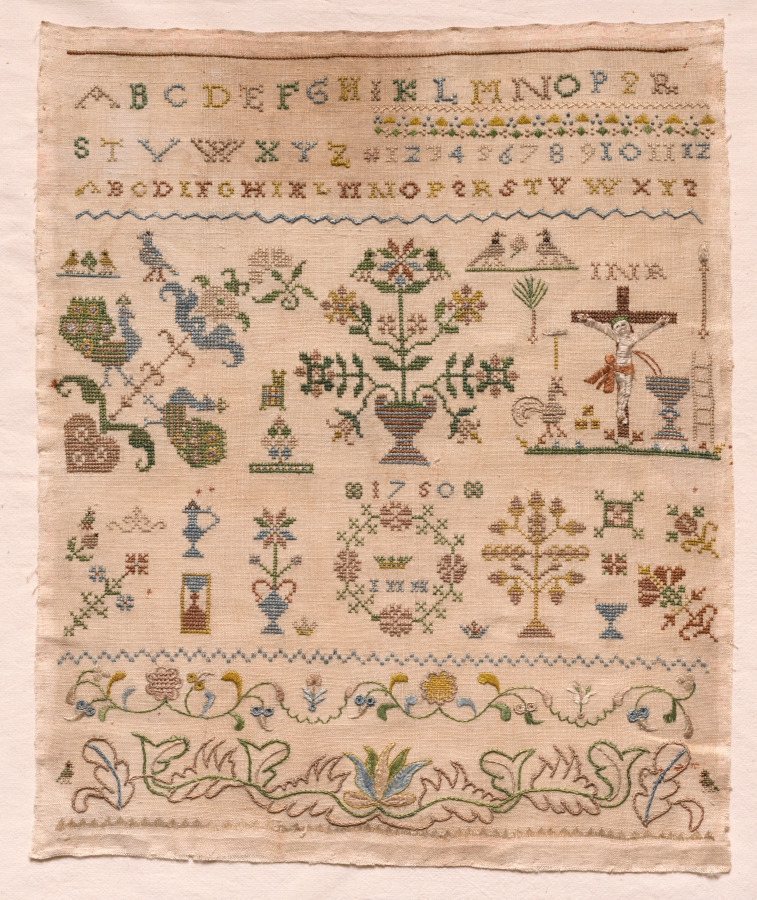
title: Sampler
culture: America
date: 1750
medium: embroidery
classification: Sampler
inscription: top band consists of letters of the alphabet repeated twice and numbers up to twelve; "I N R" above a crucifix; the date "1750" and the initials "E M H" in a wreath appear in the center section.